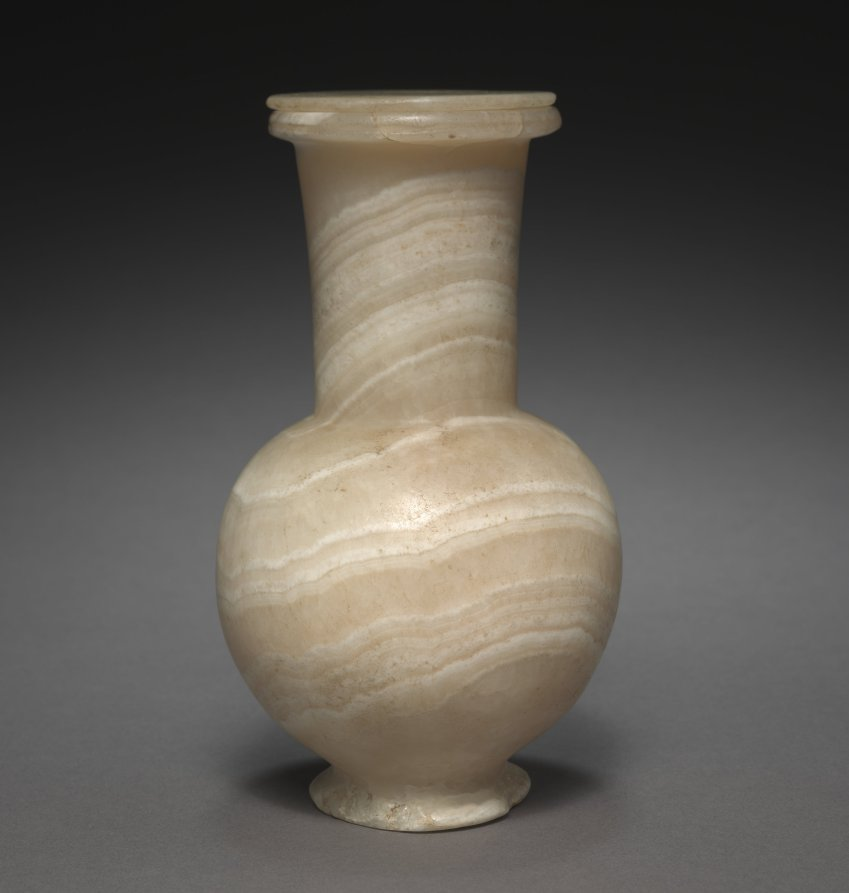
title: Long-Necked Flask with Lid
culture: Egypt, New Kingdom (1540–1069 BCE), Dynasty 18, reign of Tuthmosis III (1479–1425 BCE)–reign of Amenhotep III (1390–1352 BCE)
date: 1401–1353 BCE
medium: travertine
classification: Vessels